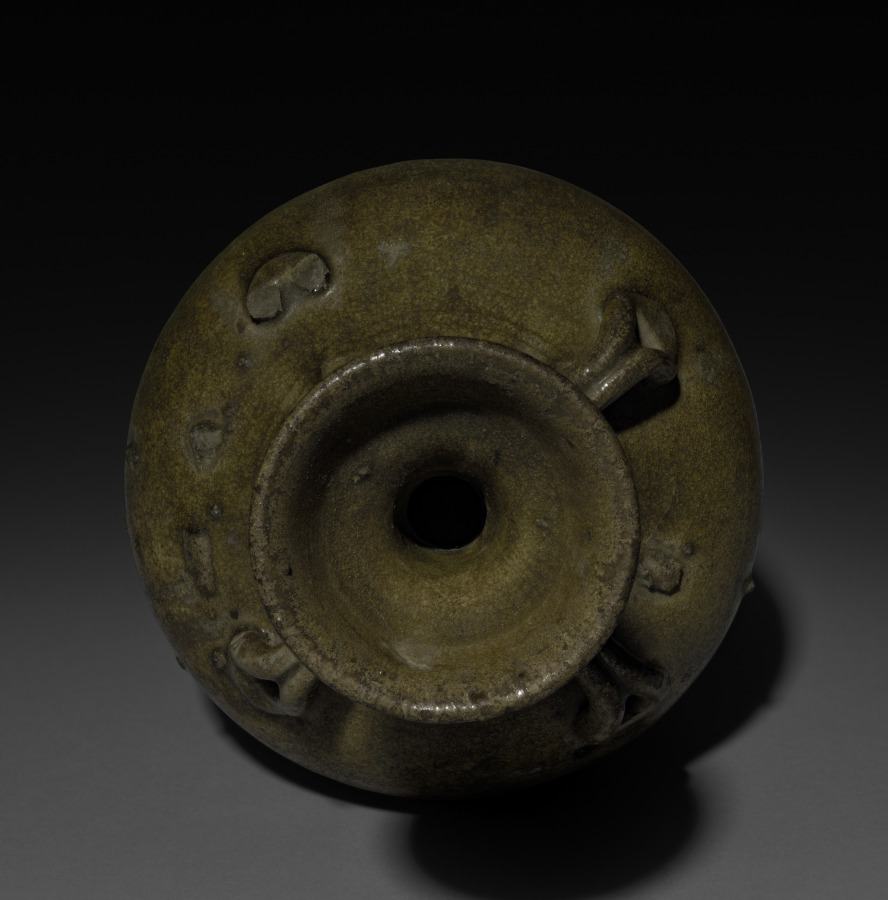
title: Vase with Loop Handles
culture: China, Sui dynasty (581-618)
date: 581–618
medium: glazed stoneware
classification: Ceramic